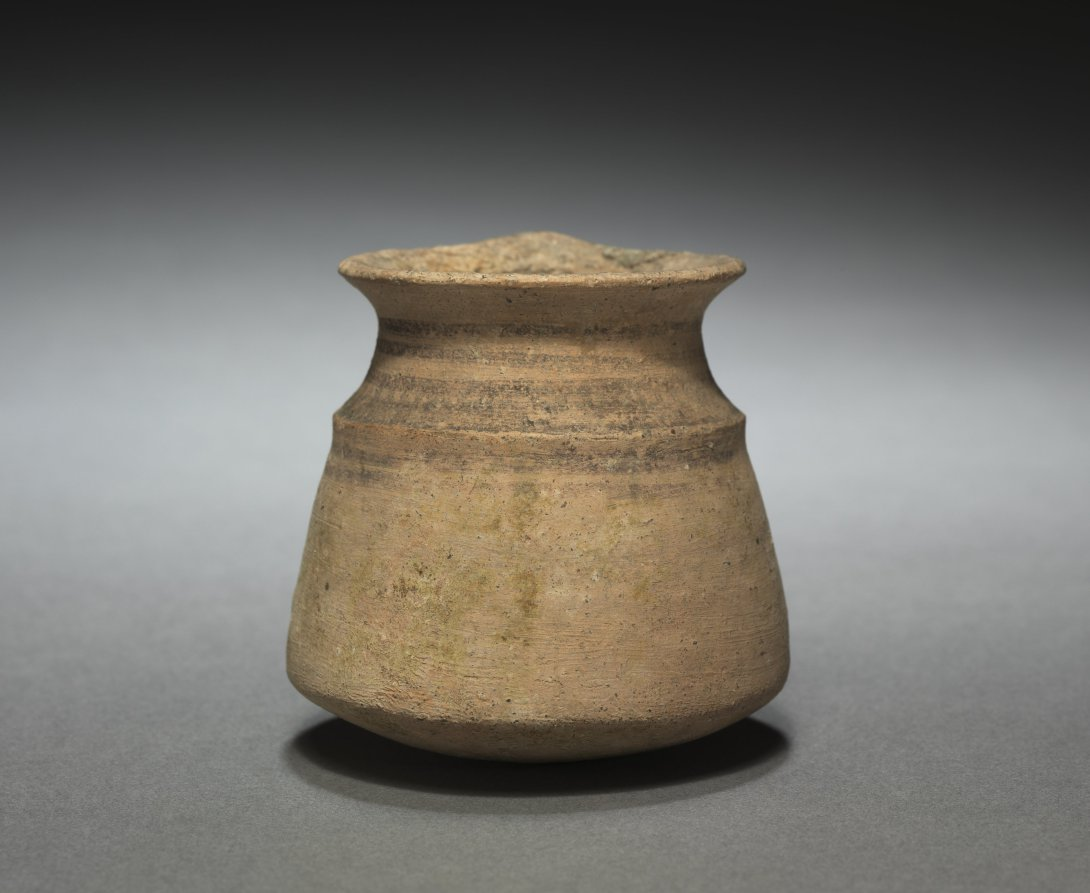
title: Pot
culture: Iran, Luristan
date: 3000–2000 BCE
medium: earthenware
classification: Ceramic